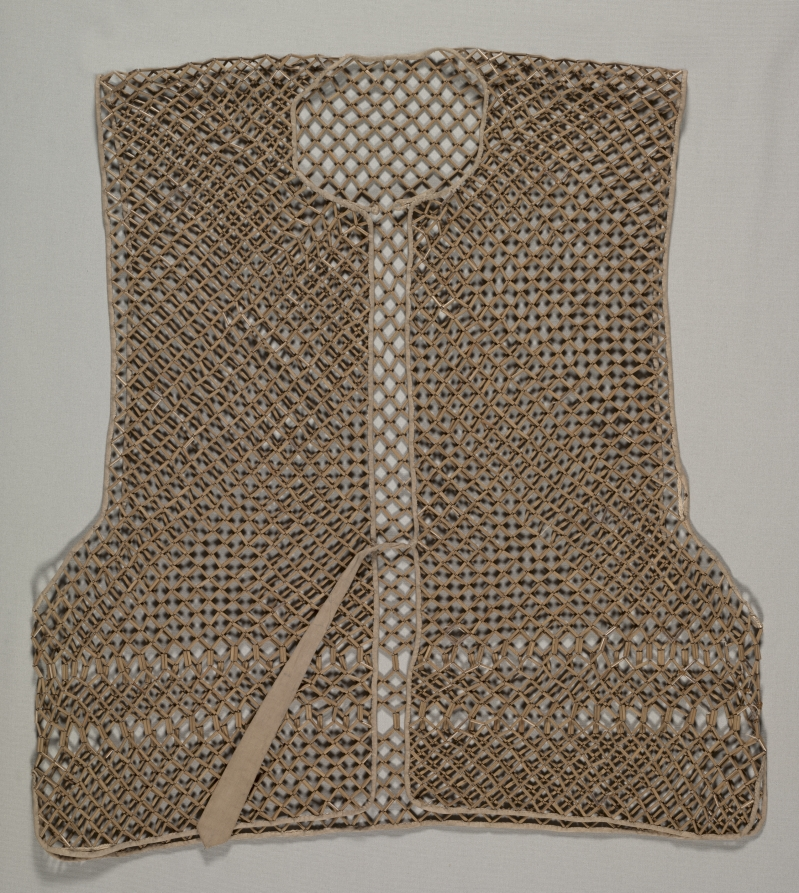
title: Sleeveless garment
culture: China, Qing dynasty (1644-1911)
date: 1800s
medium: Bamboo beads strung together in diamond and hexagon patterns; edges in plain weave cotton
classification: Garment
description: This loose-fitting bamboo vest is a summer undershirt, made of an estimated 3,490 fine bamboo tubes. The overall structure of the vest is held together with cotton thread. Such vests were worn under an outer garment to allow the air to circulate and protect the outer garment from soilage, especially in the hot and humid climate of southern China. Textual evidence indicates that officials during the 1500s in Jiangnan wore bamboo vests from Jiangsu province, one of the production centers.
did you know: According to Nhat Quyen Nguyen, CMA graduate intern in textile conservation, this garment is made of at least 3,490 cut bamboo pieces.